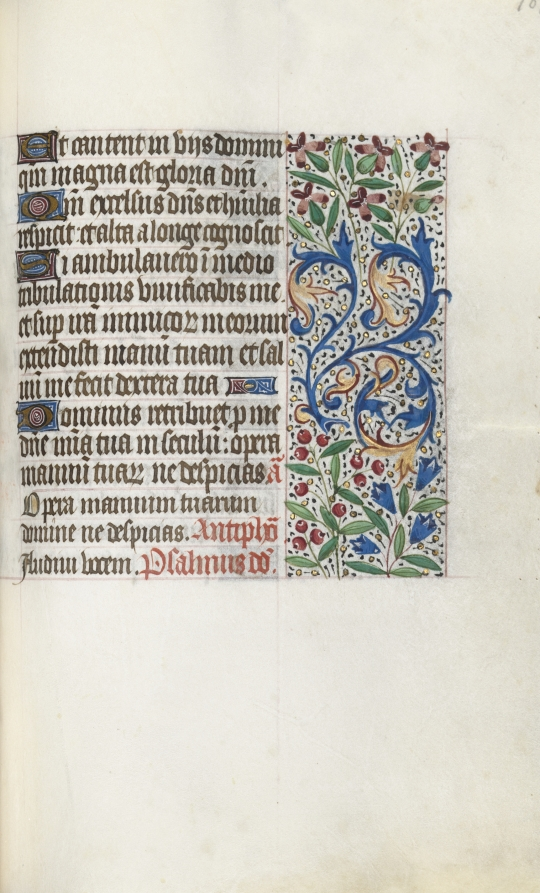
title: Book of Hours (Use of Rouen): fol. 107r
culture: France, Rouen, 15th century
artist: Master of the Geneva Latini (French, active Rouen, 1460–80)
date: c. 1470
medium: ink, tempera, and gold on vellum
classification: Bound Volume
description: In the late 1400s and early 1500s Rouen was an established and important center of book production. The city’s cathedral had a wealthy chapter that spent large sums of money to commission books and to maintain its extensive library. The stationers and booksellers would have likely been concentrated in or near the cathedral precinct. This artist, named after a manuscript now in Geneva, was Rouen’s principal illuminator during the second half of the 1400s.